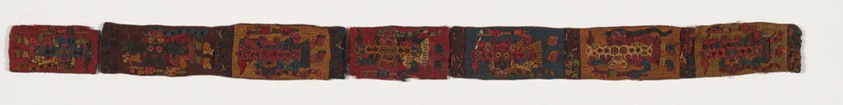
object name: Textile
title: Fragments (Border)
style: nazca, paracas, andean, andes, Pre-Columbian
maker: Nazca; Peru, south coast, Nazca Valley, Coyungo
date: 100 B.C./A.D. 200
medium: Cotton, plain weave; embroidered with camelid wool and cotton in stem and running stitches.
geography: Peru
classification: textile; needlework (visual works)